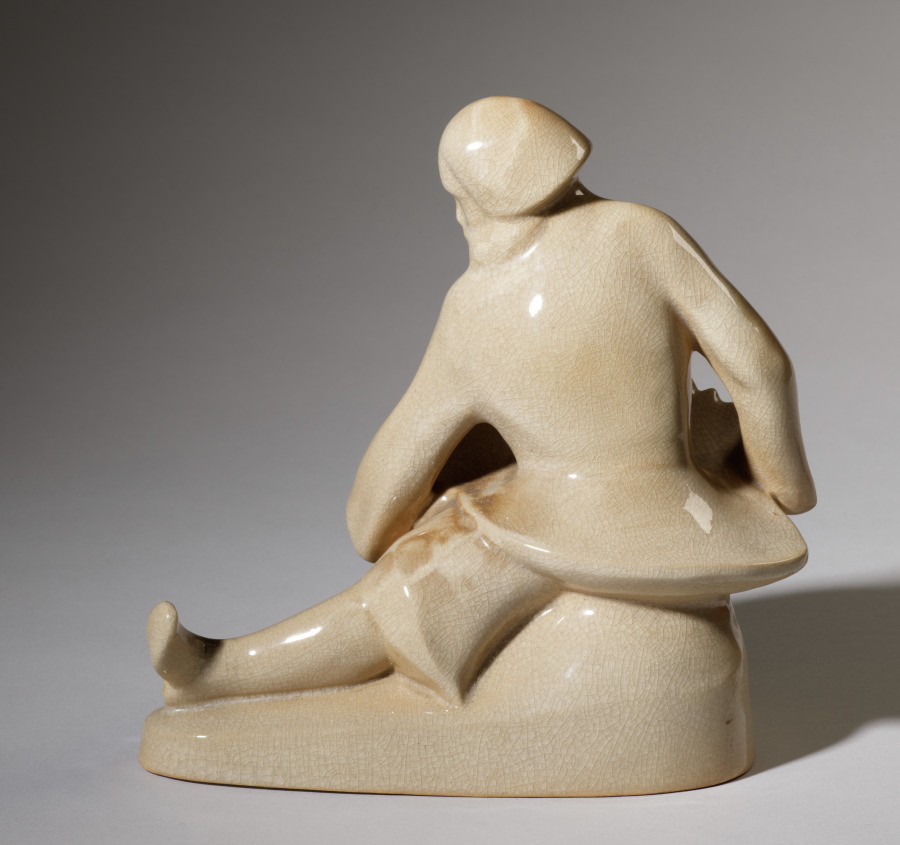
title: Accordion Player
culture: America, Ohio, Cleveland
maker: Cowan Pottery Studio (America, Rocky River, Ohio, 1920–1931)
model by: Alexander Blazys (American, born Russian Empire [now Lithuania], 1894–1963)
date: 1927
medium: mold-made ceramic, glazed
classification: Ceramic